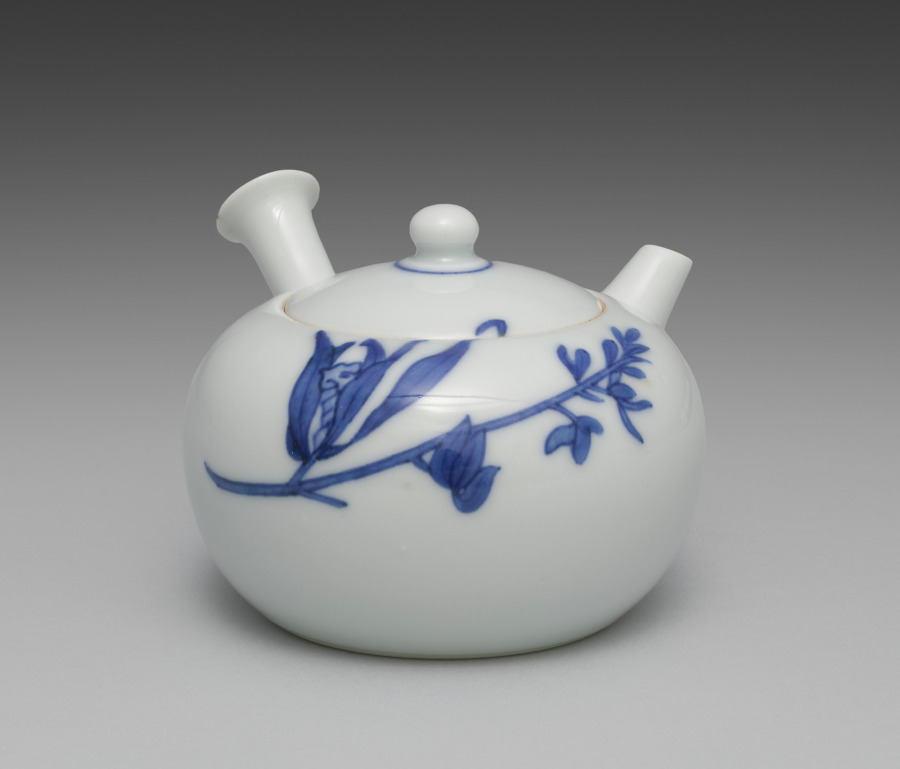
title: Teapot from Tea Set with Orchids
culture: Japan, Meiji period (1868–1912)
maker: Seifū Yohei III (Japanese, 1851–1914)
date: c. 1893–1914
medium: Porcelain with underglaze blue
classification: Ceramic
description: Although the teapot here is stored in a separate box from the five cups, these six pieces may once have been part of a tea set that included other tools such as a water cooler. The teacups have orchid flowers on both sides in underglaze blue, as well as a blue band inside the footring. The teapot has the same design and a blue band painted around the bottom of the lid’s knob. The cups’ long wood storage box is stamped on the exterior, over the lid and base, with a small red seal reading “Satō.” The same seal appears on five small squares of yellow textile, one placed in the bottom of each compartment in the teacup storage box. These are additional to the customary yellow cloths stamped with a “Seifu” seal. Interestingly, four of the Seifū cloths are stamped with an ovoid seal, while the remaining cloth, which is a slightly lighter color, has an unusual seal that is not quite gourd-shaped and with the fū of Seifū in a stylized, unrecognizable form. The teapot has its own box with a Satō seal and is wrapped with an orange textile stamped with the same unusual Seifū seal. A set with a very similar surface design is in the Brooklyn Museum. The Brooklyn set has a water cooler and a small pitcher, in addition to the teapot and cups, and all are in a single storage box. This box records the tea tools as made with kanpakuji, or “bright-jewel white porcelain,” counted among Yohei III’s most important inventions, and carved images. In fact, both sets have a white surface much closer in coloration to the cool white of porcelain clay used in Kyoto at the time, and the designs are simply painted. The Brooklyn set was thus likely mismatched at some point with a box intended for another tea set. Nonetheless, the box may have helped prevent the set’s original components from being dispersed, and the set itself provides insight into how the other tools from the present set may have looked.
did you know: This tea set with orchids has a side-handled pot called a kyūsu, used for steeping, straining, and serving tea.